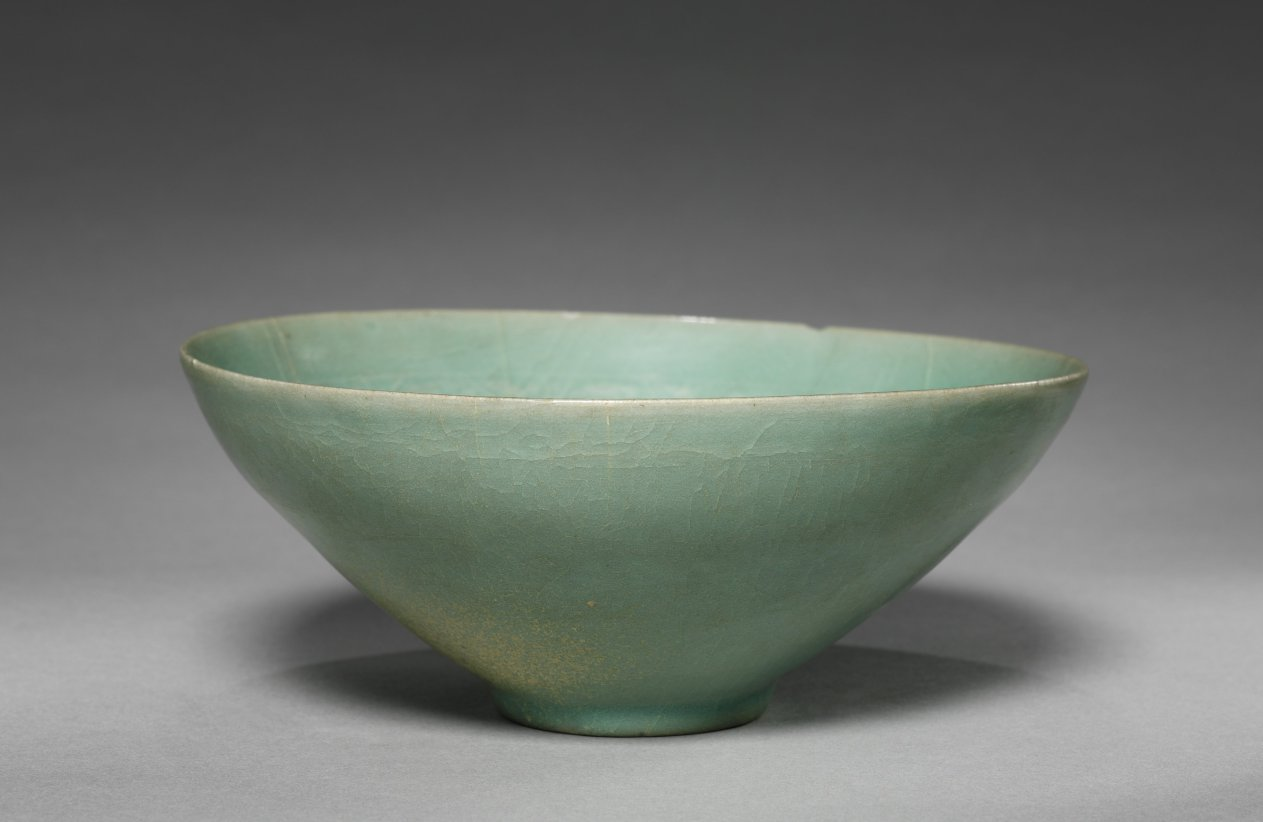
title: Bowl with Flowering Vines Design in Relief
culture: Korea, Goryeo dynasty (918–1392)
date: 1100s-1200s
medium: celadon ware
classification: Ceramic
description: As early as the 600s, the practice of drinking tea and wine became an important part of elite leisure culture in Korea. A wide bowl like this example was especially suitable for drinking powdered tea shaved from a compressed tea cake, the most commonly enjoyed type during the Goryeo period. The image of flowering vines in relief on the inner wall of this tea bowl must have made the moment of drinking tea more enjoyable.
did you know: This type of celadon bowl was modeled after Ru ware of northern China. Xu Jing (1091–1153), the Chinese official who visited Korea in 1123, called the Korean celadon ware as the “new kiln ware of Ru-zhou.”